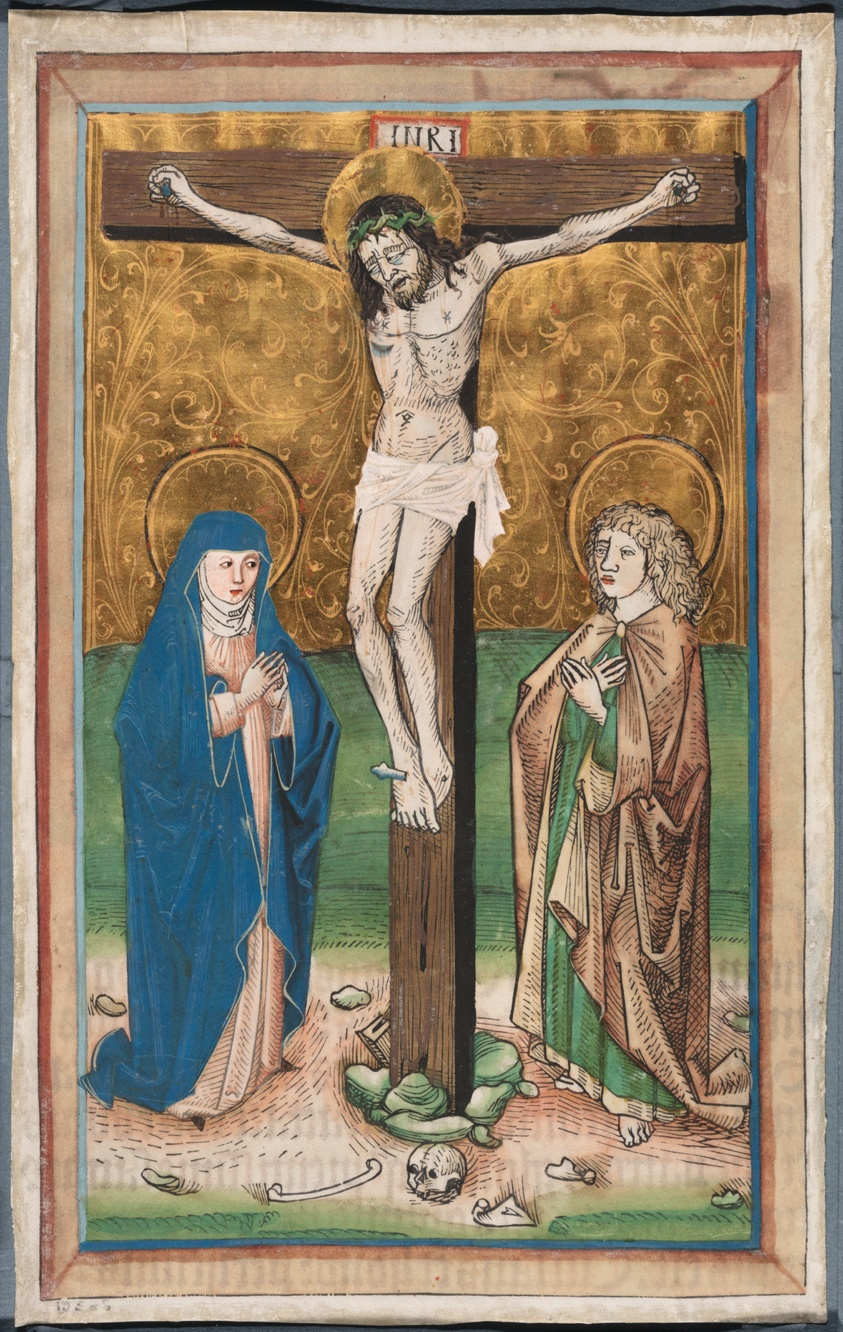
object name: Drawing and Watercolor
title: Crucifixion with the Virgin Mary and Saint John (recto); Saint Sebald with the Donors Paul Volkmayr and Sebald Schreyer (verso)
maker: Unknown Artist; German, 15th century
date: c. 1485–90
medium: Woodcut illuminated on vellum, with miniature on verso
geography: Germany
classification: woodcut; print; prints and drawing; drawings (visual works)